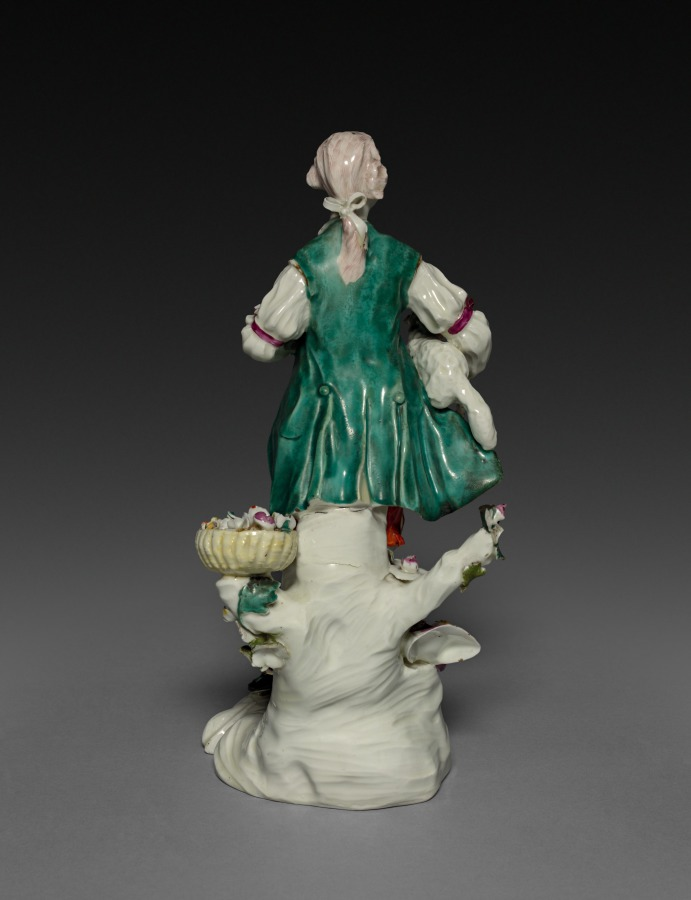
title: Farmer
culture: England, Derby, mid-18th century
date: 1760–1765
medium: soft-paste porcelain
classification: Ceramic